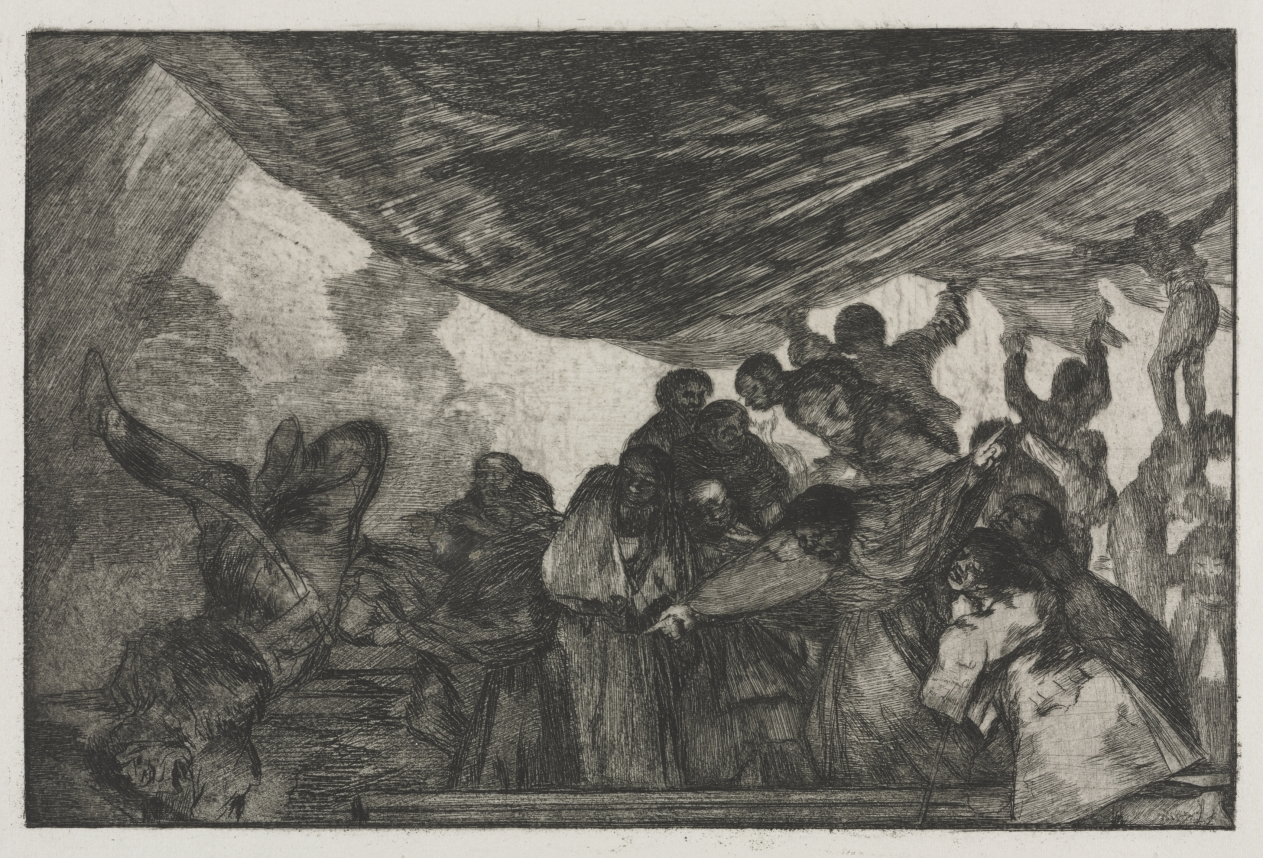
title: The Proverbs: Clear Folly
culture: Spain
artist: Francisco de Goya (Spanish, 1746–1828)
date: 1864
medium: etching and aquatint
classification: Print